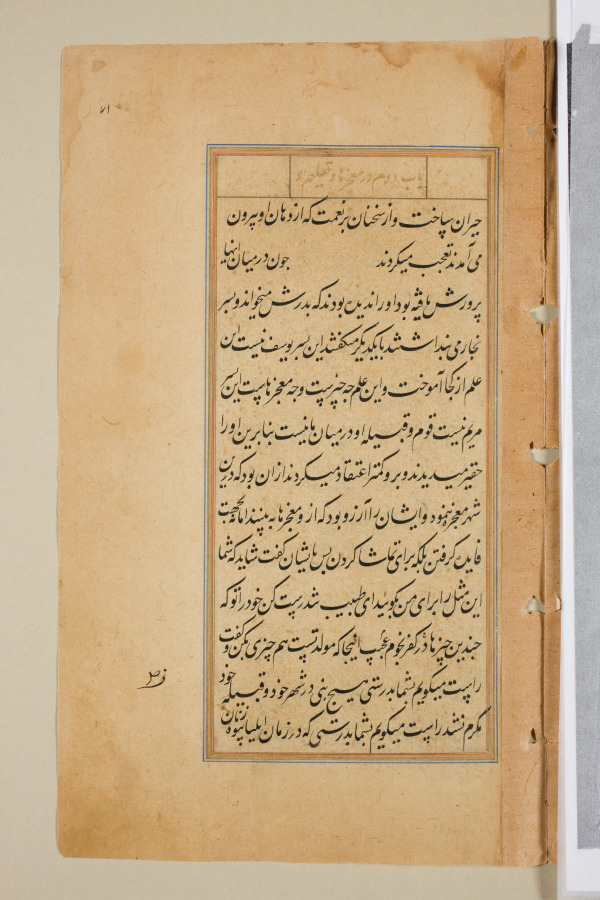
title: Text page from a Mirror of Holiness (Mir’at al-quds) of Father Jerome Xavier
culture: Mughal India, Allahabad, made for Prince Salim (1569–1627)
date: 1602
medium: Ink and gold on paper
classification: Manuscript